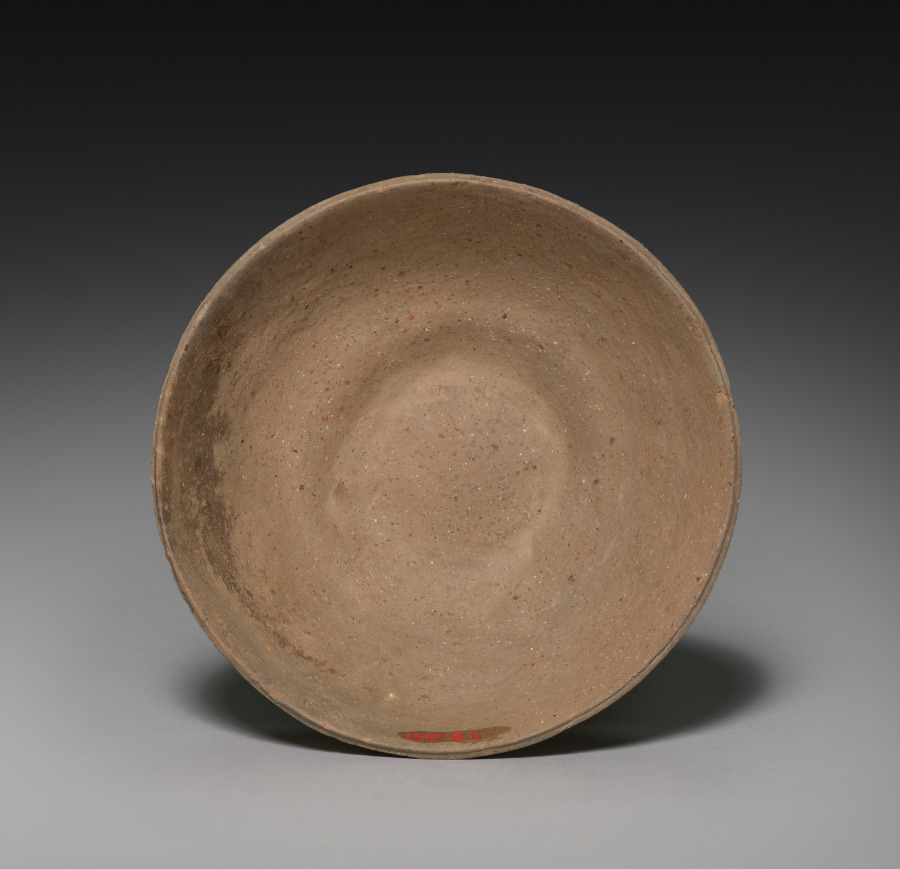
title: Lidded Jar with Four Horn Lugs (lid)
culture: Korea, Gaya period (42–562 CE)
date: 200s–400s CE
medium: earthenware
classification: Ceramic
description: Closed kilns built on hillsides became widely used for producing this type of pottery vessel in Korea during the Three Kingdoms period. Both its gray color and shimmering glaze are the result of the reduction of oxygen in the closed kiln chamber built on hillsides.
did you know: This pottery vessel served to contain cremated remains, indicating the popularity of Buddhist mortuary practice in Korea during the Three Kingdoms period.